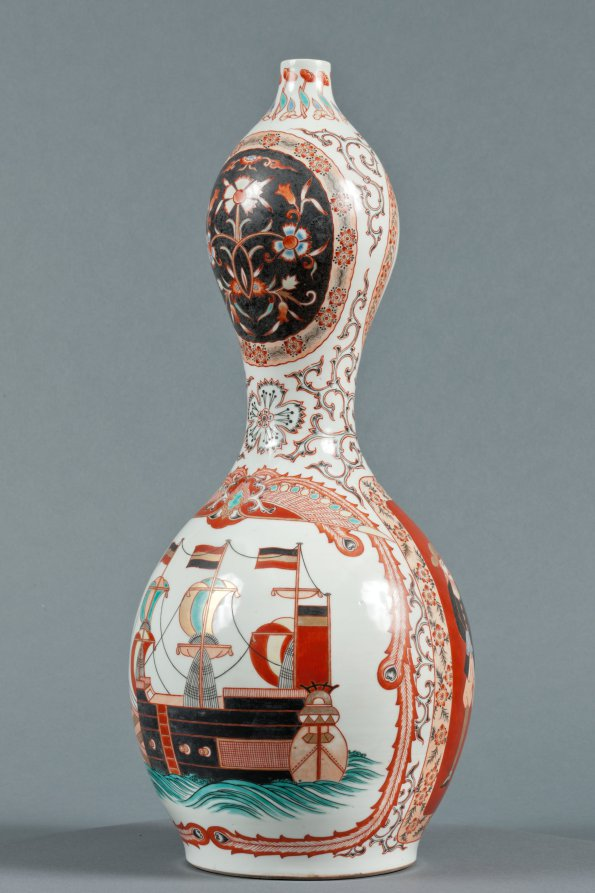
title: Bottle with Western Ships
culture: Japan, Edo period (1615–1868)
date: c. 1800–1868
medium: Porcelain with decoration in colored enamels and underglaze blue, overglaze enamels, and gold (Hizen ware, Arita type)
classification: Ceramic